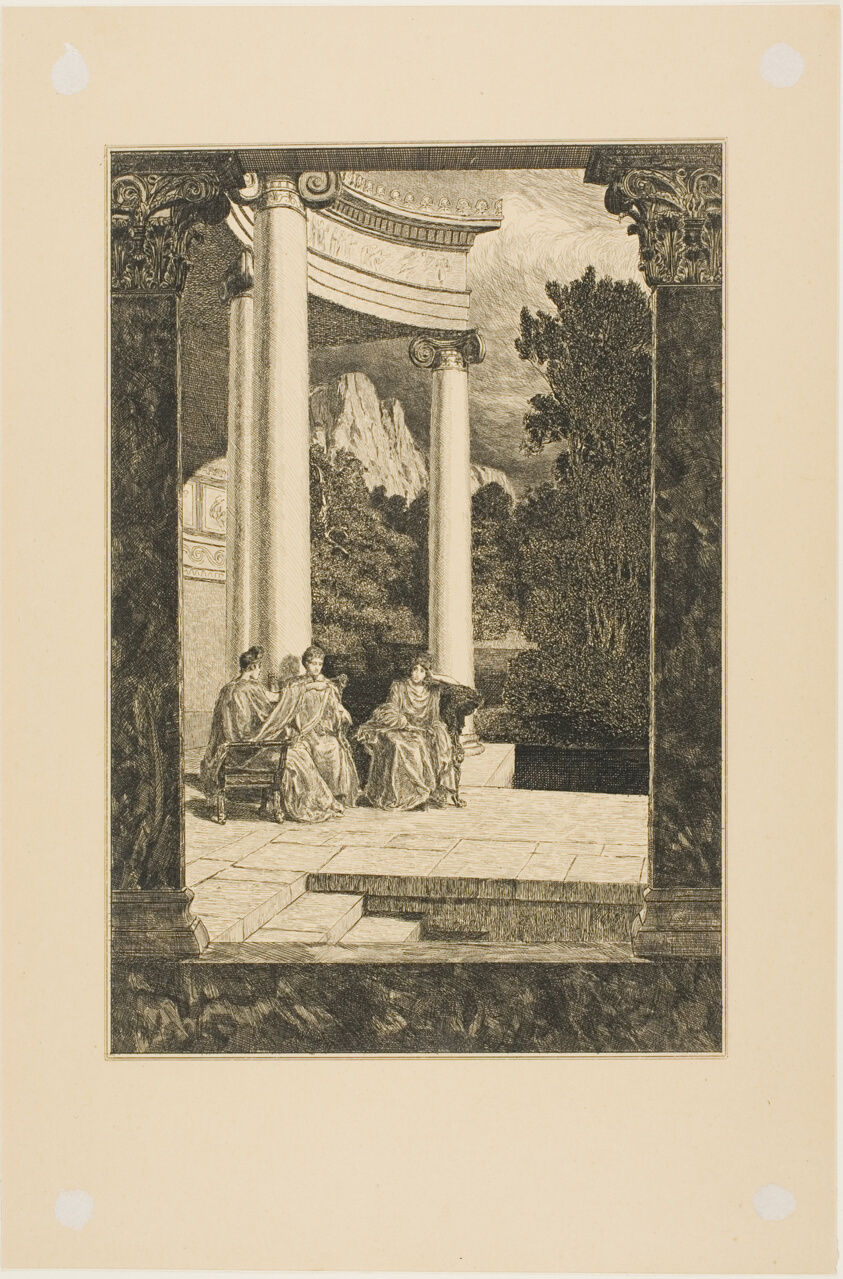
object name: Print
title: Psyche and her Sisters, plate 18 from Cupid and Psyche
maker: Max Klinger (German, 1857-1920)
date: 1880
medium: Etching and aquatint on paper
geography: Germany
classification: etching; print; prints and drawing